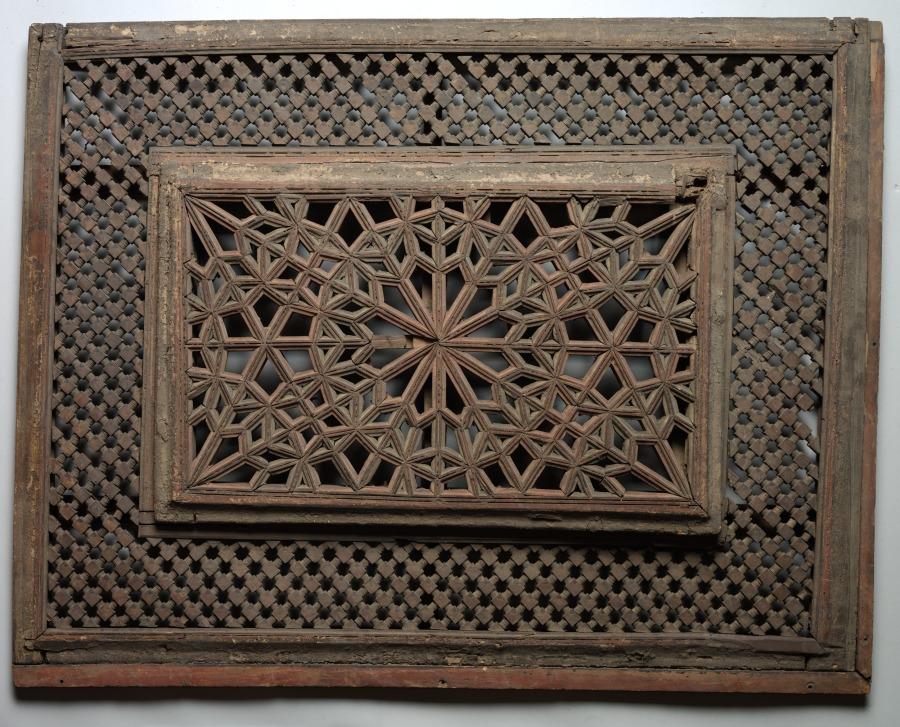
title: Carved Wood Panel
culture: India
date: 1700s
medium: wood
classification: Wood